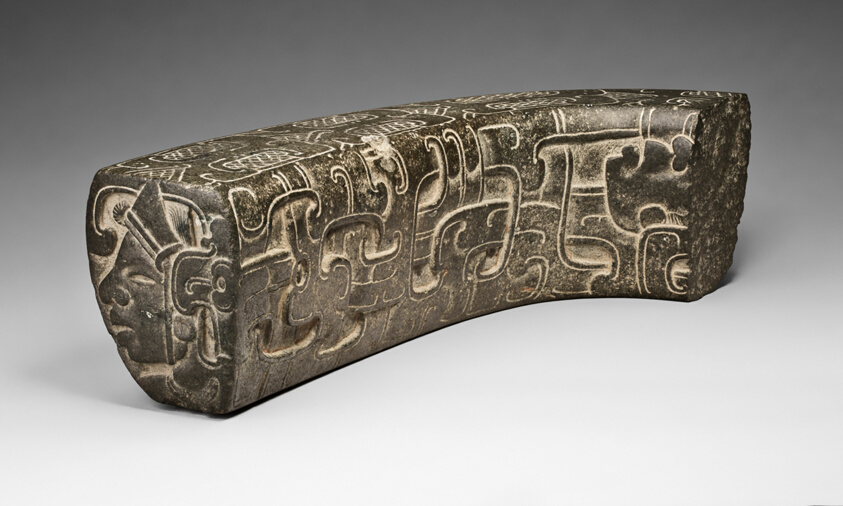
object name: Sculpture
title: Fragment of a Ceremonial Ballgame Yoke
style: totonac, tajin, classic veracruz, mesoamerican, Pre-Columbian, americas, Arts of the Americas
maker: Totonac; El Tajín and vicinity, northern Veracruz, Mexico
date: 700–800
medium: Stone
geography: El Tajín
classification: ceremonial object; stone; sculpture; art of the americas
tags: sports, scrolls (motifs), ceremony, ritual, games, abstract figures, faces, supernatural